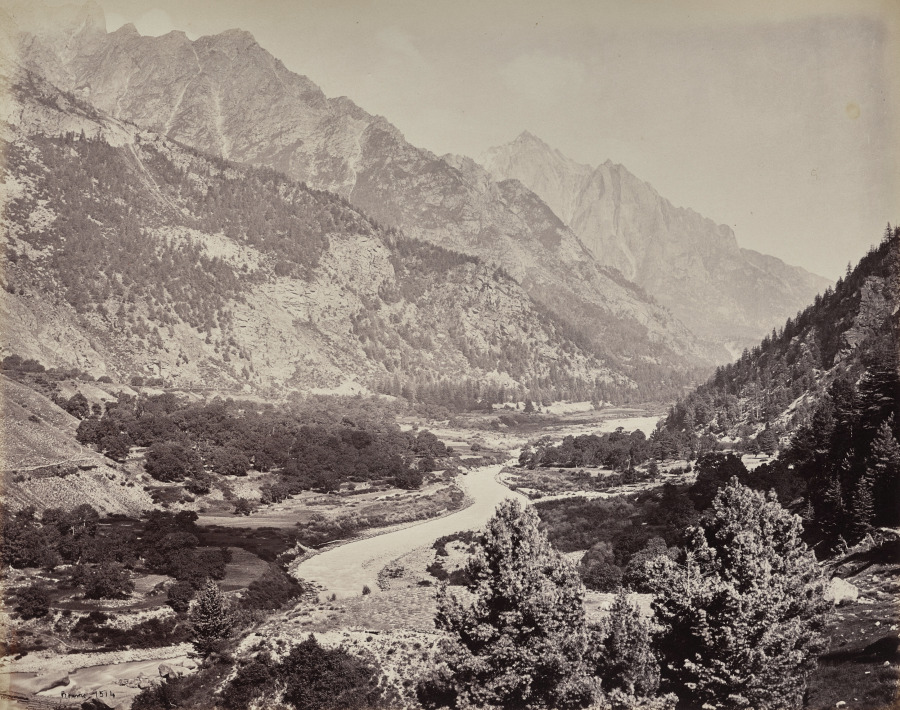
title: The Upper Himmalayahs. View in the Buspa Valley from Sangla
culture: England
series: Photographs of Northern India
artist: Samuel Bourne (British, 1834–1912)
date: 1863–70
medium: albumen print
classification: Photograph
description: The 50 images in this album, all taken in the 1860s, move from the hill towns of the Himalayas down to cities including Lahore (now in Pakistan), Delhi, Lucknow, Agra, Benares (now Varansi), and Calcutta (now Kolkata). Architectural studies of major monuments offer valuable historical records of what sites such as the Taj Mahal and the imperial mosque of the Mughal emperors in Delhi looked like before 20th-century restorations.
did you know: Samuel Bourne, the author of most the images in this album, was a banker in England before he moved to India to become a professional photographer.